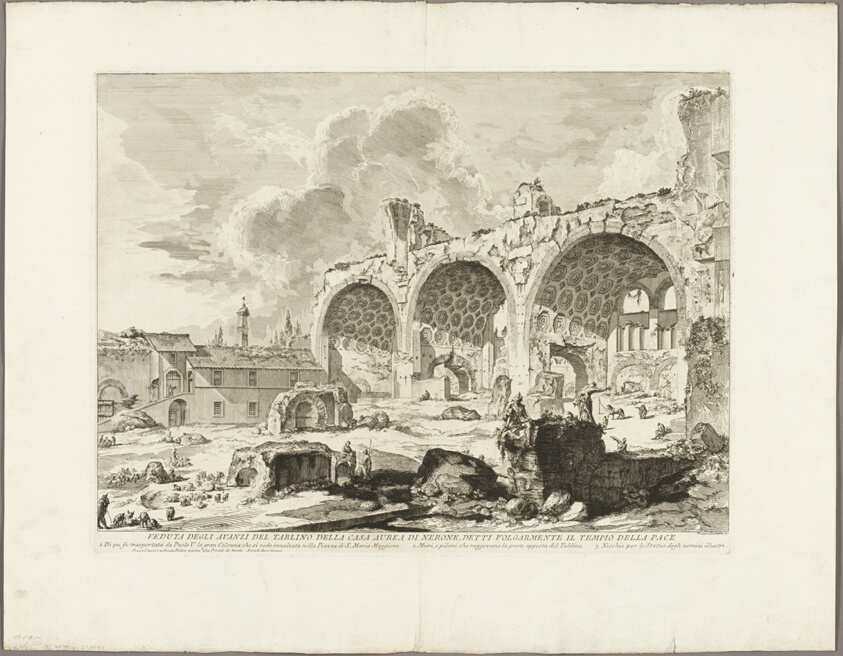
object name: Print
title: View of the Remains of the Dining Room of the Golden House of Nero, commonly called the Temple of Peace, from Views of Rome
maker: Giovanni Battista Piranesi (Italian, 1720-1778)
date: 1750/59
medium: Etching on heavy ivory laid paper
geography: Italy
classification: etching; print; prints and drawing